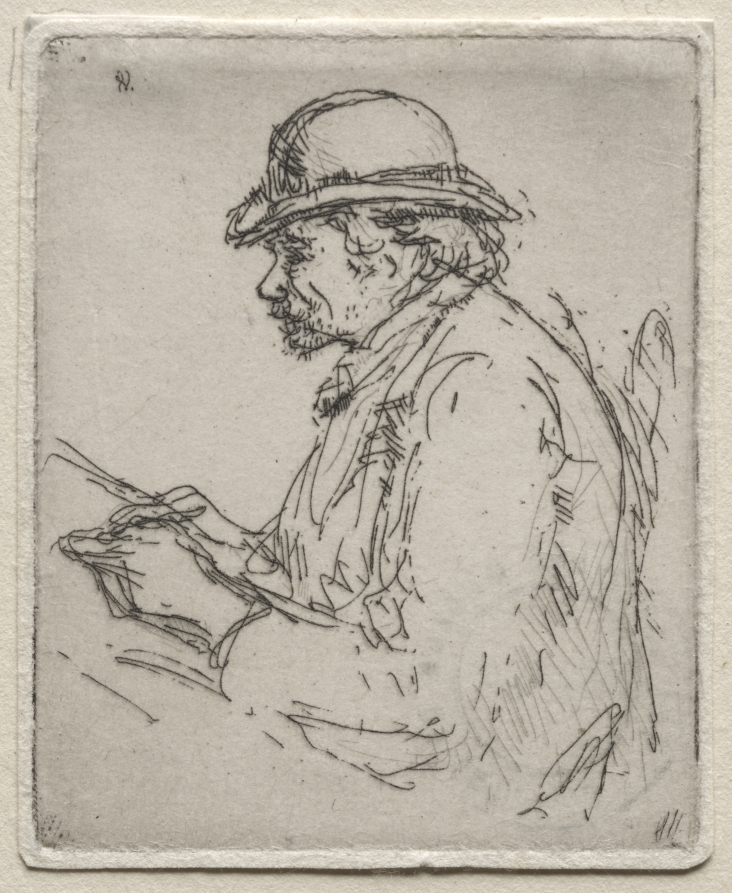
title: Paris: Café Artist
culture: America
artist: Ernest Haskell (American, 1876–1925)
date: 1910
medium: etching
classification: Print